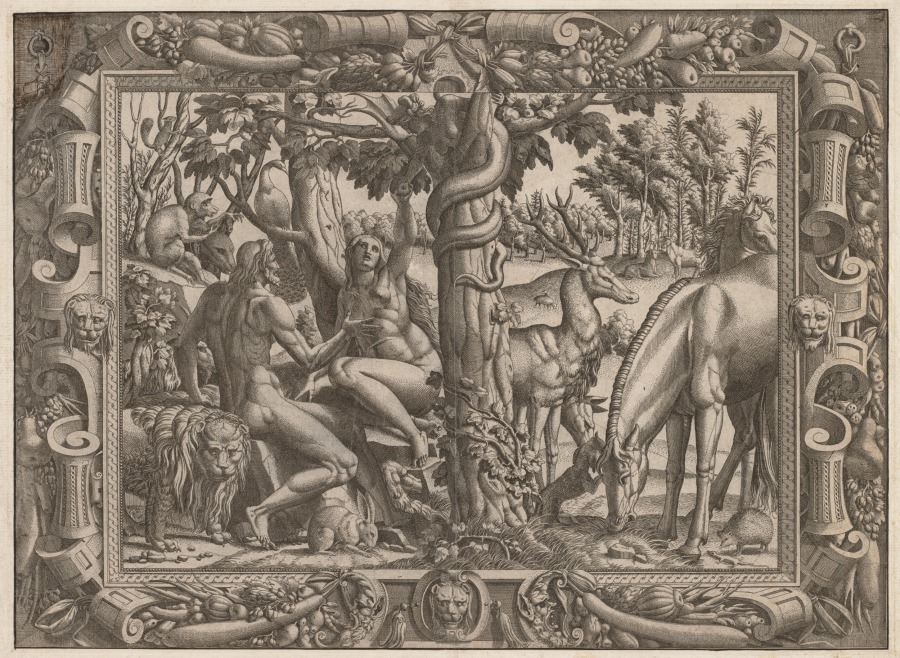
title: The Temptation of Eve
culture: France, 16th century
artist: Jean Mignon (French, active c. 1535–55)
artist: after Luca Penni (Italian, 1500/04–1557)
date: 1535–55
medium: etching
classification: Print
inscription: SECONDARY SUPPORT, upper right, in pen and brown ink: No. 25[underlined] ; upper right, in graphite: 755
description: In the 1540s Italian artist Luca Penni worked at the French king François I’s court at Fontainebleau. He created this image of the temptation of Eve (etched by Jean Mignon) by directly quoting Michelangelo’s figure of Eve from the Fall of Man scene on the Sistine Chapel ceiling. The twisting serpent around the tree and the figure of Adam to the left—though altered from Michelangelo’s original—are still reminiscent of the earlier composition. Penni added his own unique elements, such as a landscape scene with animals and a decorative border featuring grotesques, cornucopias, and scrollwork.